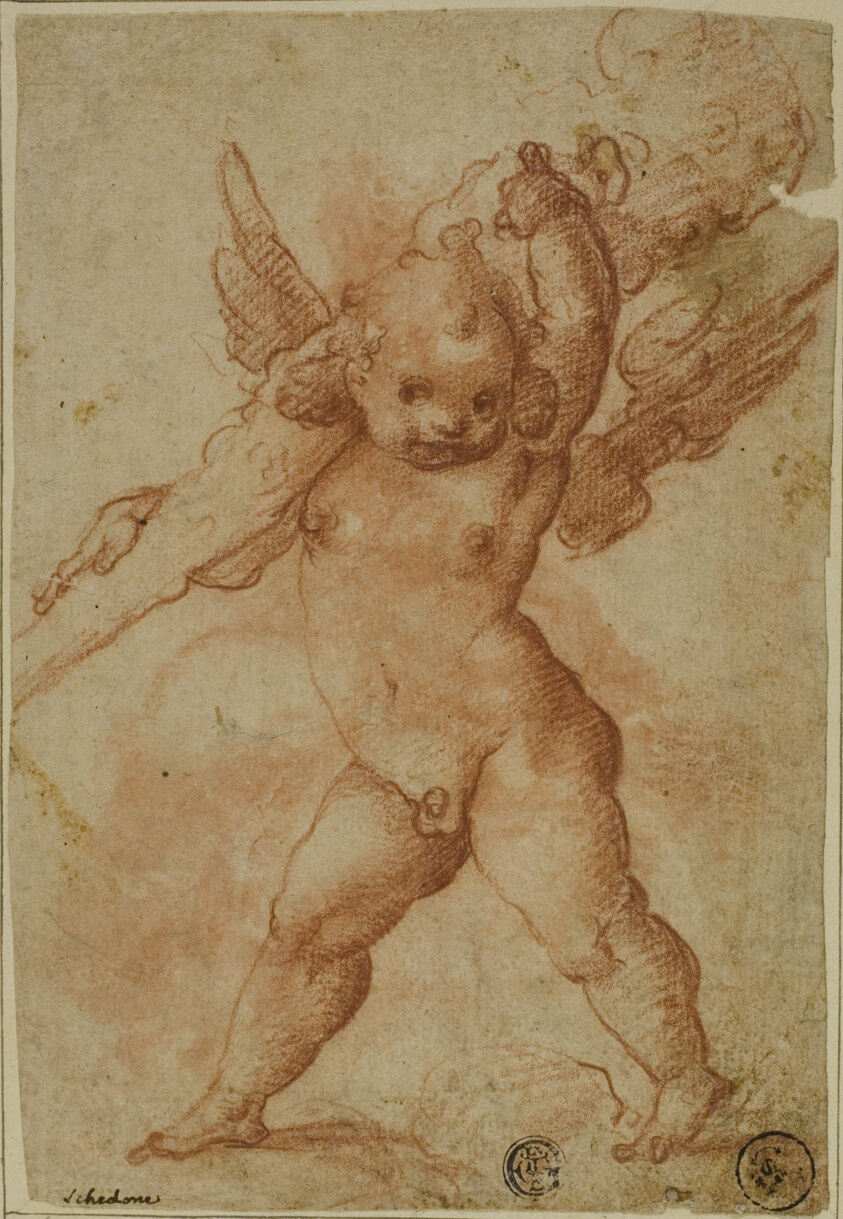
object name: Drawing and Watercolor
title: Putto with Club of Hercules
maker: Marco Marchetti, called Marco da Faenza (Italian, c. 1526-1588); or Raffaellino Motta, called da Reggio (Italian, 1550-1578); or Bartolomeo Schedoni (Italian, 1578-1615); or Circle of Cherubino Alberti (Italian,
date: 1575/78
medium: Red chalk with brush and red chalk wash, on buff laid paper, laid down on cream laid paper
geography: Italy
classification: chalk; drawings (visual works); prints and drawing